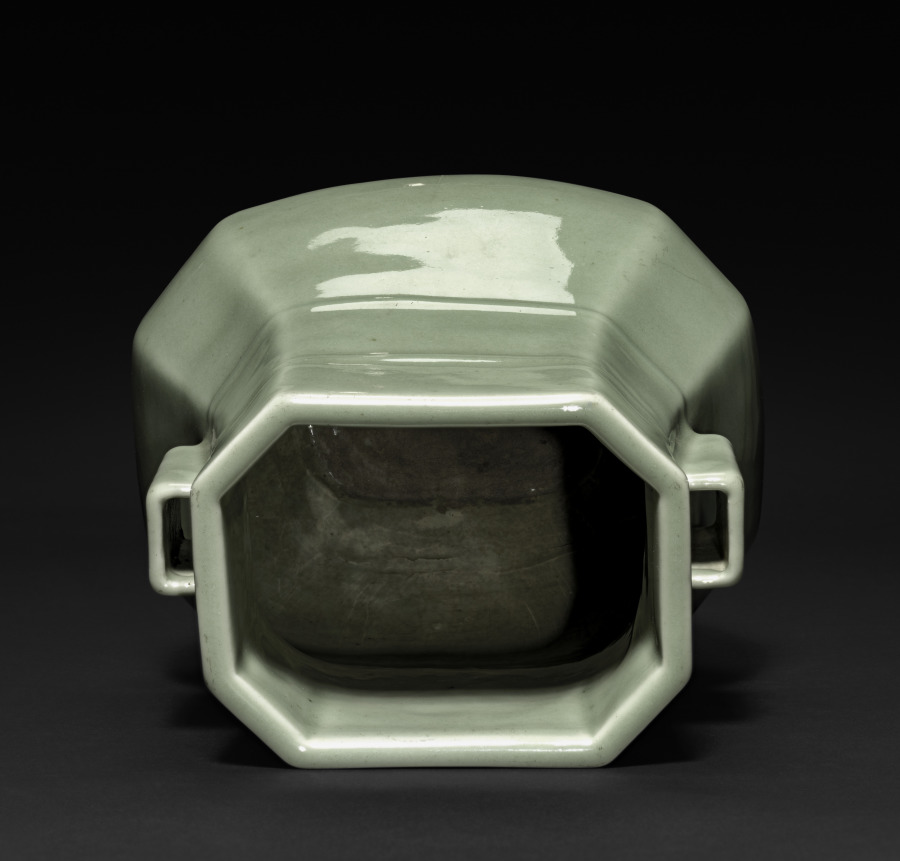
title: Suspension Vase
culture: China, Jiangxi Province, Jingdezhen kilns, Qing dynasty (1644–1911), Yongzheng mark and reign (1722–35)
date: 1723–35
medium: porcelain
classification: Ceramic